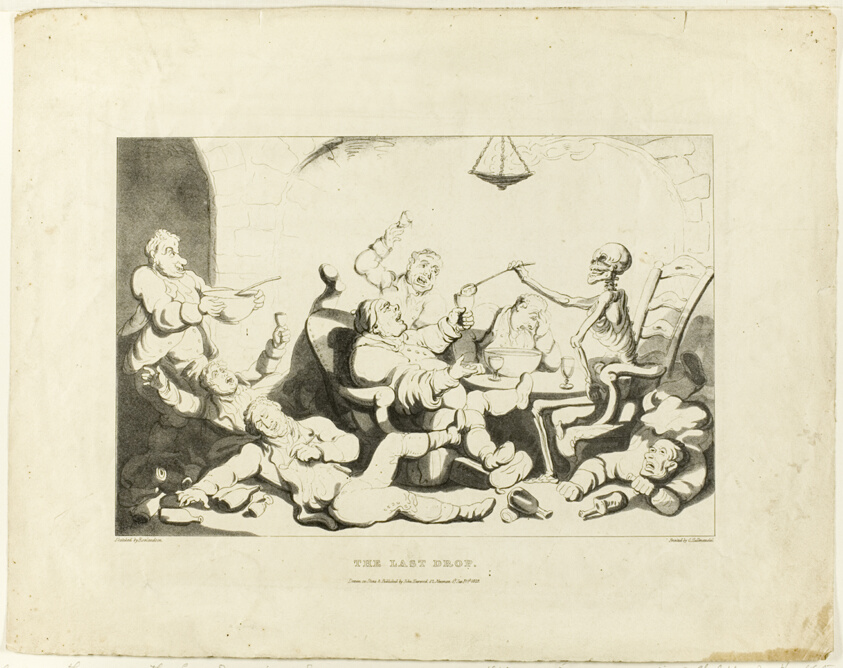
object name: Print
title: The Last Drop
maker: Charles Joseph Hullmandel (English 1789-1850); after Thomas Rowlandson (English, 1756-1827)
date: published January 1, 1829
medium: Lithograph on paper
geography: England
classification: etching; print; prints and drawing